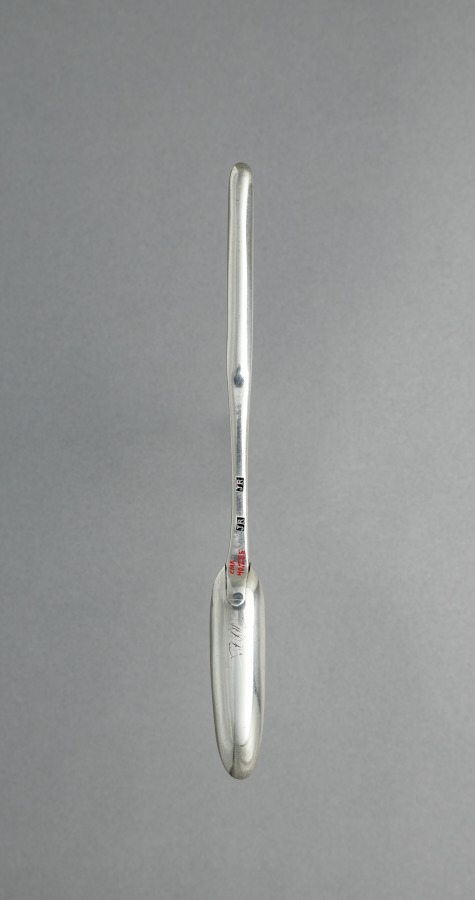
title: Marrow Scoop/Spoon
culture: America, Pennsylvania, Philadelphia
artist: attributed to Joseph Richardson (American, 1752–1831)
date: c. 1790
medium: silver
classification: Silver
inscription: engraved "MDL" in bright-cut script on back of larger scoop, and "E" in script on top of joint above smaller scoop.